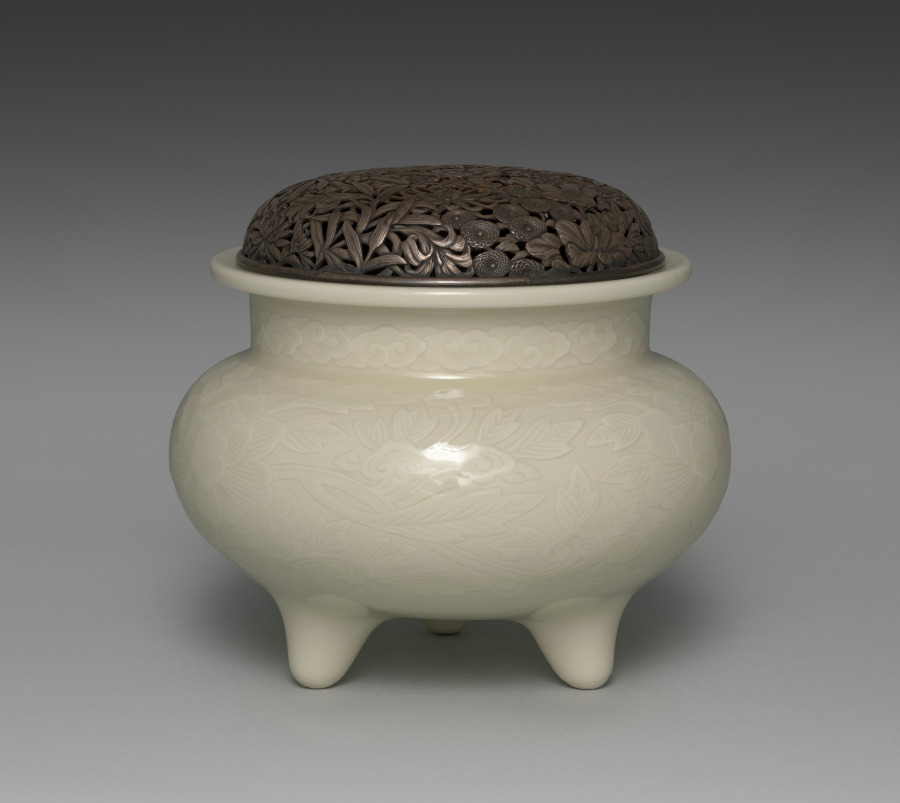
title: Incense Burner with Peony and Cloud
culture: Japan, Meiji period (1868–1912)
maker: Seifū Yohei III (Japanese, 1851–1914)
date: 1914–46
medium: Porcelain with molded and incised design, pale pink glaze, and floral openwork silver lid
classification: Ceramic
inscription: 清風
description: Yohei IV’s incense burner has a scrolling floral pattern of peonies and nyoi staff-head forms around the body and a band of clouds around the collar. These are done in low relief, with incised lines marking the details in the flower petals and leaves. The silver lid has a proliferation of flowers, including lily, peony, and a variety of chrysanthemums. The box lid identifies the subtle pink over an ivory body as “dawn’s light[–glazed] porcelain” (shokōji). After he became an Artist of the Imperial Household, Yohei III created a number of glaze and clay combinations with what would have been considered Japan-focused names to be in alignment with his position as an artist representing the nation. Among them was a glaze called “dawn’s light pale [pink] color” (akebonoiro tansai), which he invented in 1895. It is possible that this incense burner is an example with this glaze, despite the slightly different name given on the box. While the name alludes to the Land of the Rising Sun, an epithet for Japan, the burner’s motifs remain very much drawn from the Chinese repertoire.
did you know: Seifū Yohei IV’s incense burner has a pale pink glaze named “dawn’s light.”